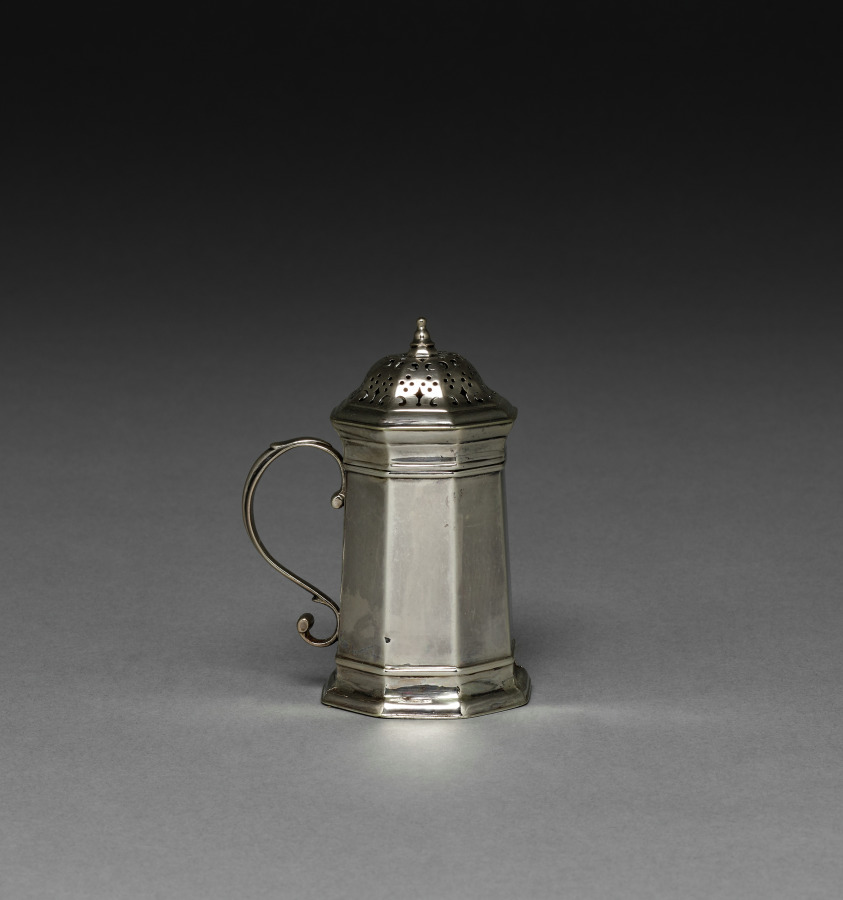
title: Caster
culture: America, Massachusetts, Boston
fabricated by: Jacob Hurd (American, 1702–1758)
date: 1743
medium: silver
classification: Silver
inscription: Engraved underside: "The Gift of \ Mrs J. Ross \ to H.T \ 1743" and "J.E.C." (later, in script). Small star near scam of cover band.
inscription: Stamped underside: "Hurd"